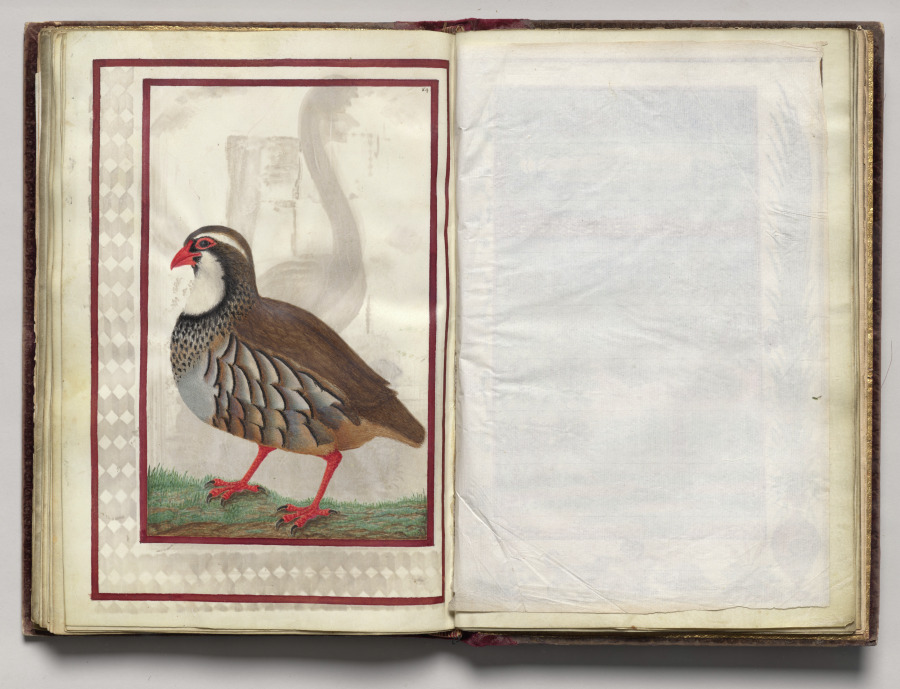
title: Partridge, folio 40 (verso), from Florilegium (A Book of Flower Studies)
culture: France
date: 1608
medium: watercolor, ink, silver and gold over occasional traces of pencil, on vellum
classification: Bound Volume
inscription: Dated: Poitiers 1608 (on frontispiece) Signed: On frontispiece in black ink, lower right: Van Kuyk Notation on drawing: Frontispiece: in pencil, lower margin: * élève de Van Kessel, peintre flammand (* in pencil also appears in front of Van Kuyk's name).